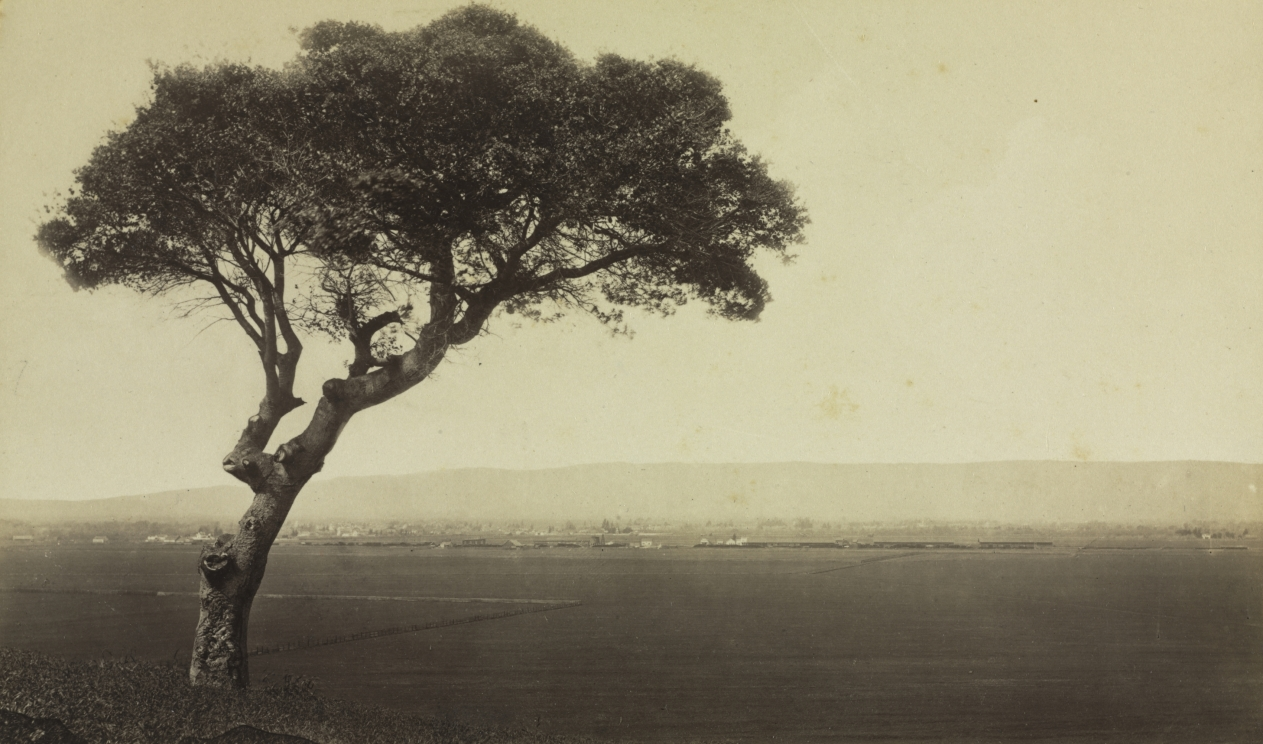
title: Untitled (Landscape near Watsonville, California)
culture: America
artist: Eadweard J. Muybridge (American, 1830–1904)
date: c. 1879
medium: albumen print from wet collodion negative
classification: Photograph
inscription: Written in light brown ink on verso of mount: "MUYBRIDGE, Photo. San Francisco"